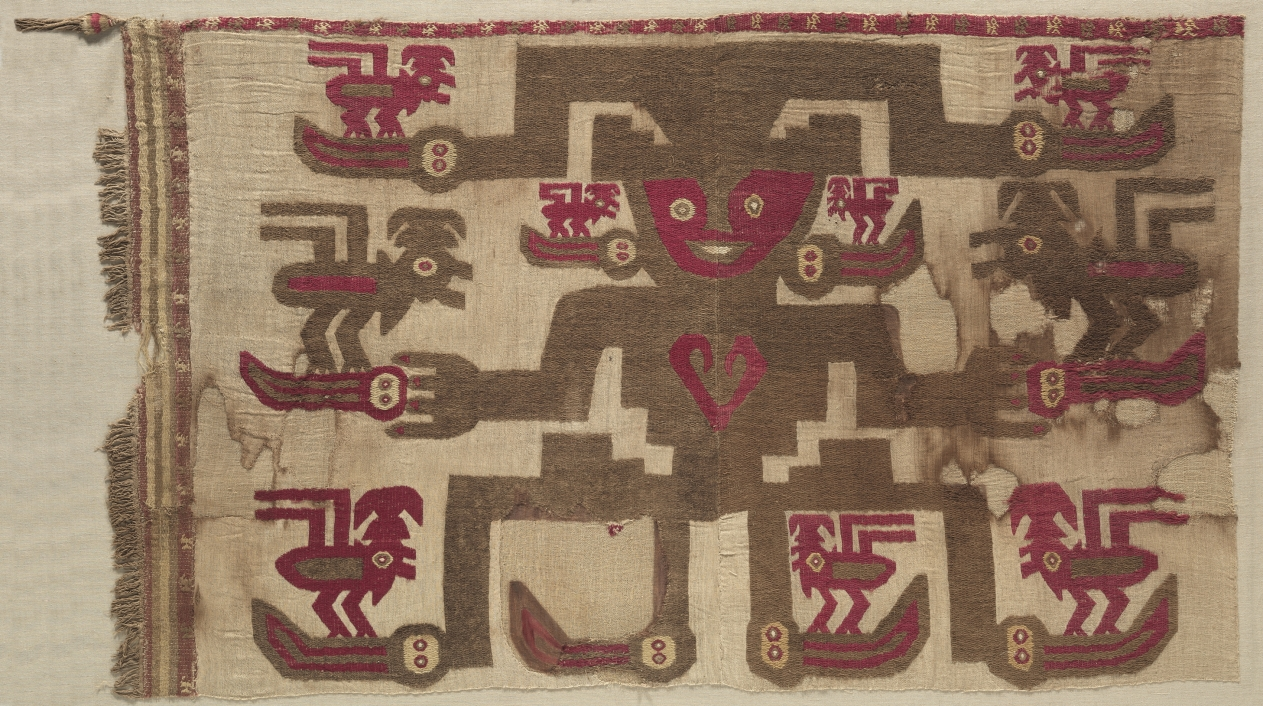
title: Large Cloth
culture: Peru, North Coast, Chimu-Inka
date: 1460–1632 (radiocarbon date, 95% probability)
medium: plain tabby, brocaded: wool and cotton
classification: Textile